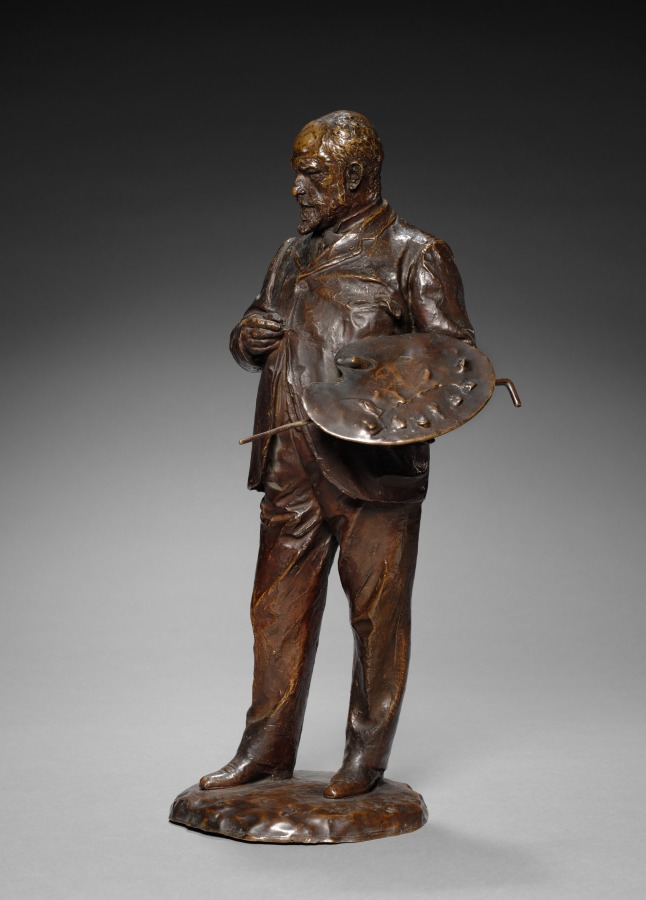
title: Standing Figure of Léon Bonnat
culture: France, 20th century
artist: Denys Pierre Puech (French, 1854–1942)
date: 1903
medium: bronze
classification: Sculpture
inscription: Signed and dated: "1903"; inscribed: "au maitre L. Bonnat"